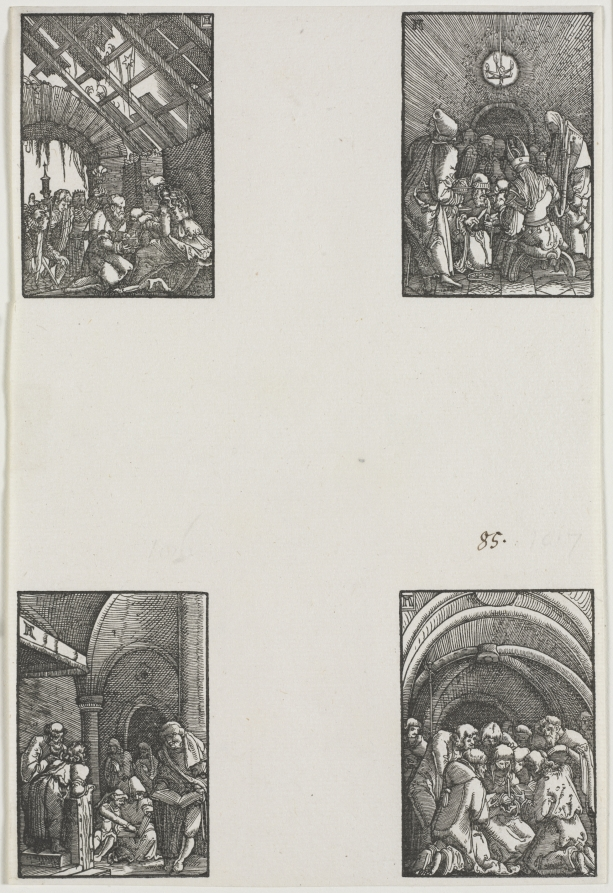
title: The Fall and Redemption of Man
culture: Germany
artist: Albrecht Altdorfer (German, c. 1480–1538)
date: c. 1515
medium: woodcut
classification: Print